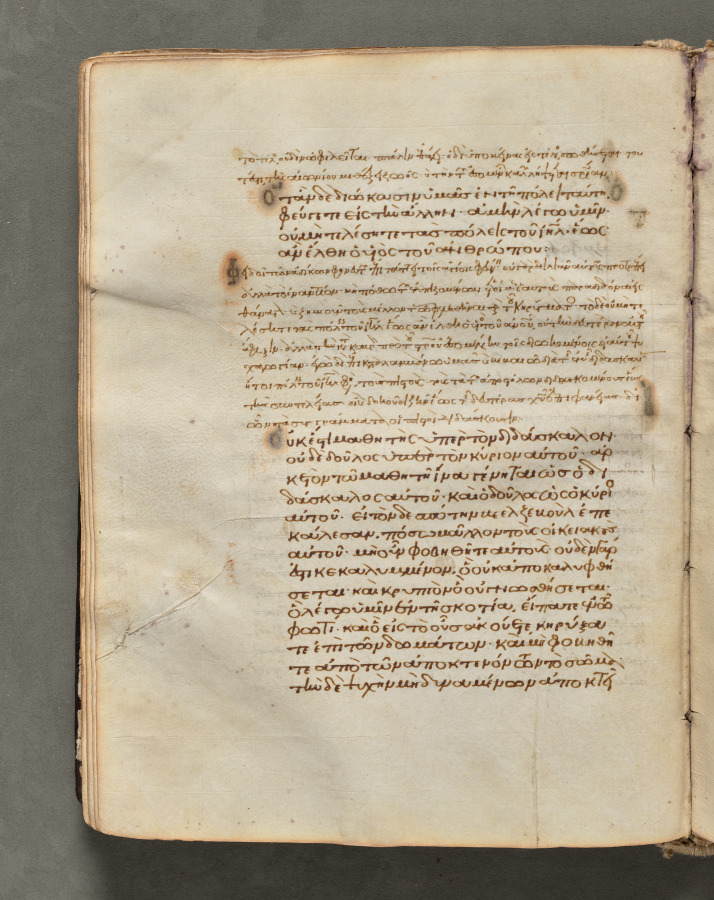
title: Text, folio 44 (verso), from a Gospel Book with Commentaries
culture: Byzantium, Constantinople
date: c. 1000–1100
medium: ink, tempera, and gold on vellum; leather binding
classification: Bound Volume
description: Each of the four gospels in this book opens on a page with brilliantly illuminated borders depicting the author of the text as well as birds-principally peacocks, symbols of the immortality of the soul-and fountains, representing the fountain of life and the salvation of the soul. This volume consists of 428 leaves with texts in Greek. Its level of sophistication suggests that it was probably written and decorated in a monastery in Constantinople.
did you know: Gospel Books were carried in procession through Byzantine churches.